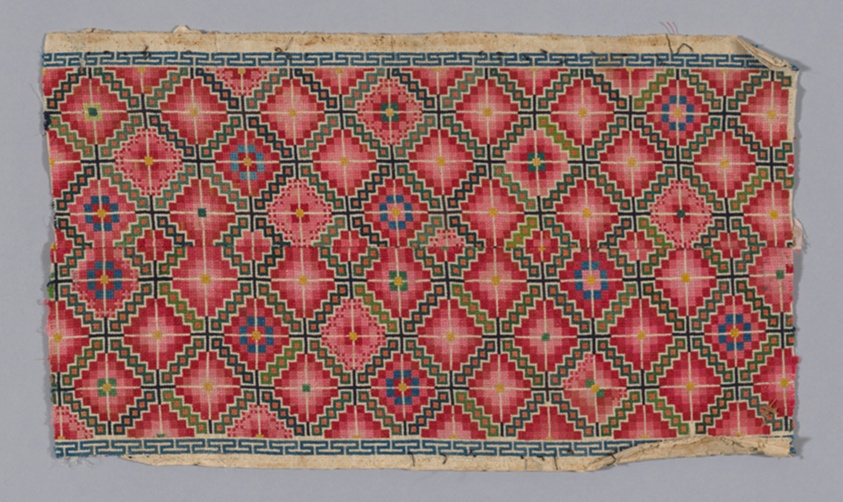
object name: Textile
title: Panel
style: qing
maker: Han-Chinese (China)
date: Qing dynasty (1644–1911), 1875/1900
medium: embroidered gauze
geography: China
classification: embroidery; textile